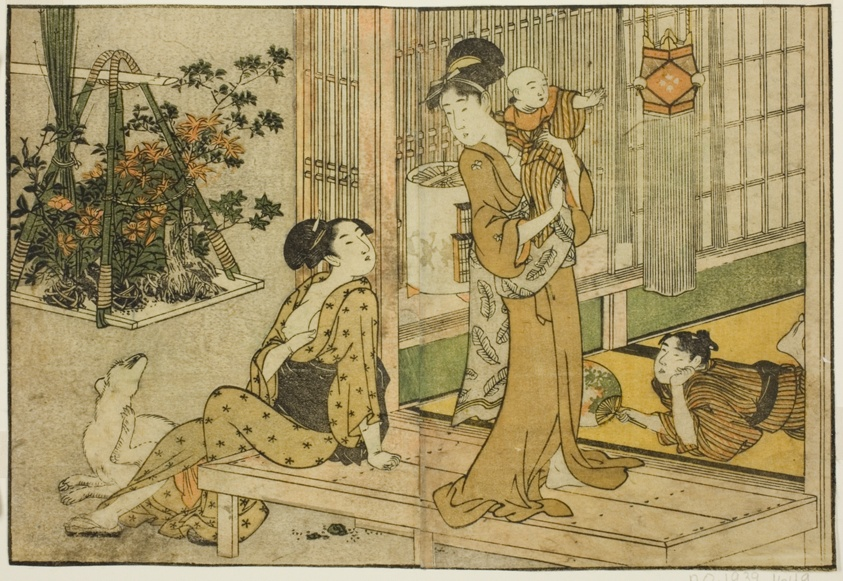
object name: Print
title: Bon Festival Lanterns and Plant Seller, from the illustrated book "Picture Book: Flowers of the Four Seasons (Ehon shiki no hana)," vol. 2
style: Japanese (culture or style)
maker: Kitagawa Utamaro 喜多川 歌麿; Japanese, 1753 (?)-1806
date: New Year, 1801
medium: Color woodblock print; double-page illustration from book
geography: Japan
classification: woodblock print; print; asian art